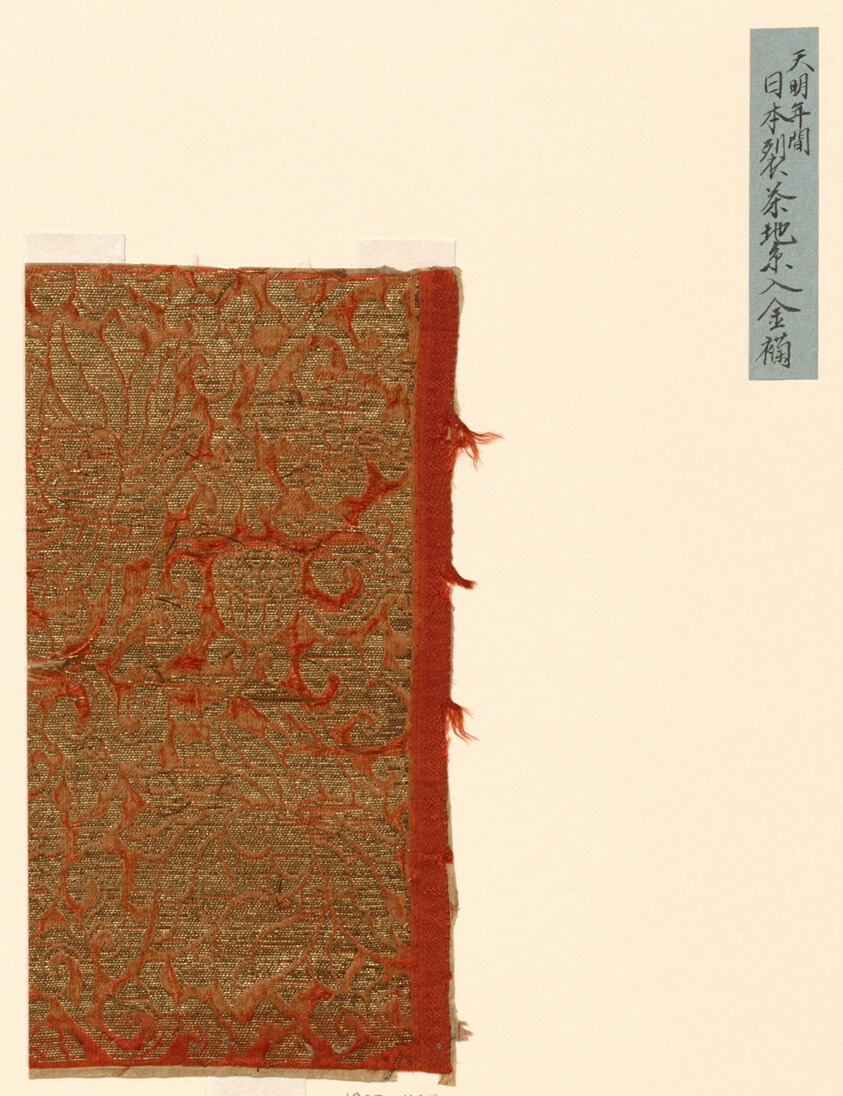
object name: Textile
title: Fragment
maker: Japan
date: Edo period (1615–1868), 1701/25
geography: Japan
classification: textile; weaving